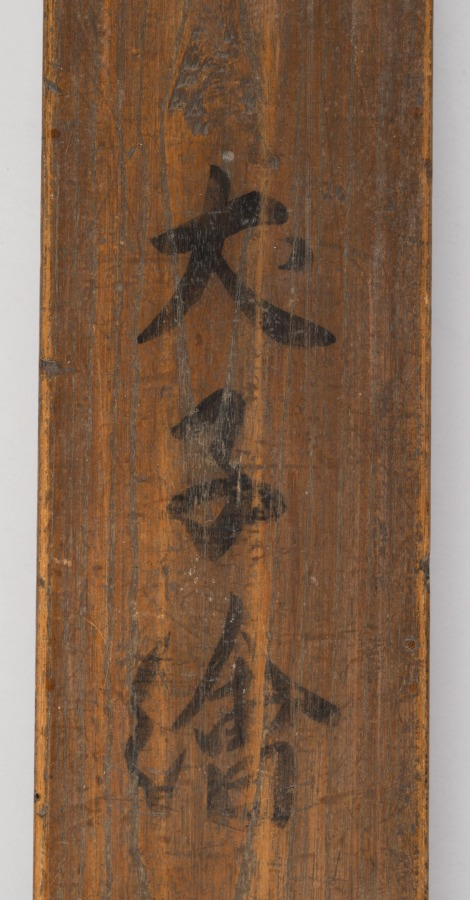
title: Puppy with Dandelions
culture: Japan, Edo period (1615–1868)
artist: studio of Tawaraya Sōtatsu (Japanese, c. 1570–c. 1640)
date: 1600–1640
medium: hanging scroll; ink on paper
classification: Painting